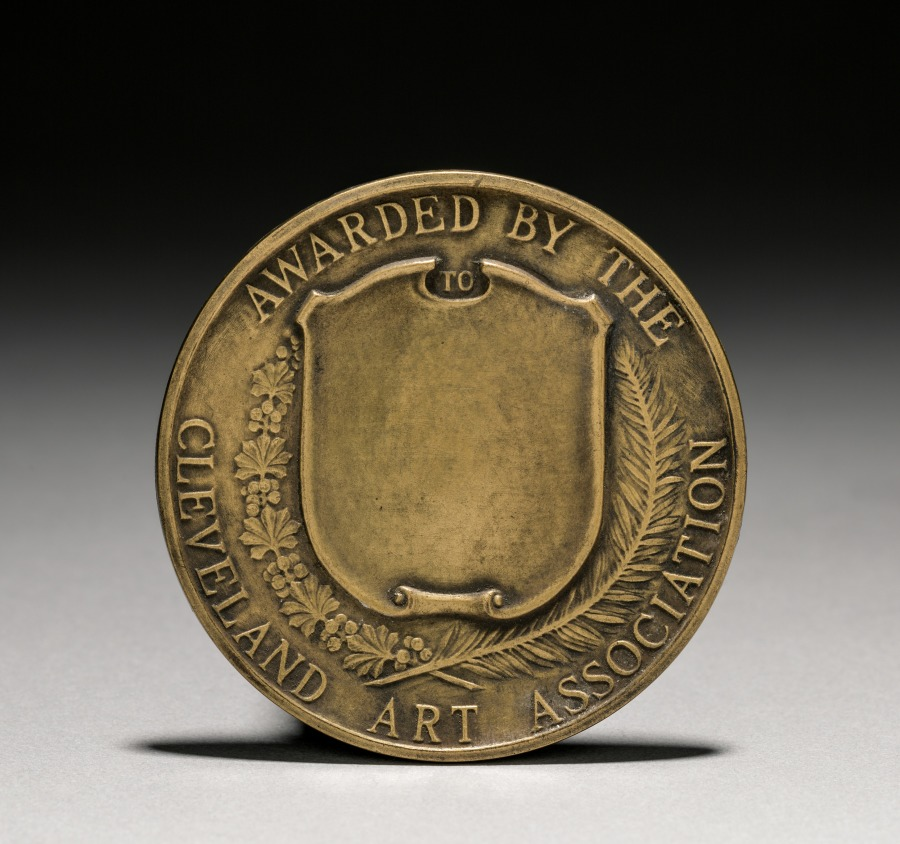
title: Penton Medal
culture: America, Ohio, Cleveland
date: early 1900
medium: bronze proof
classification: Metalwork